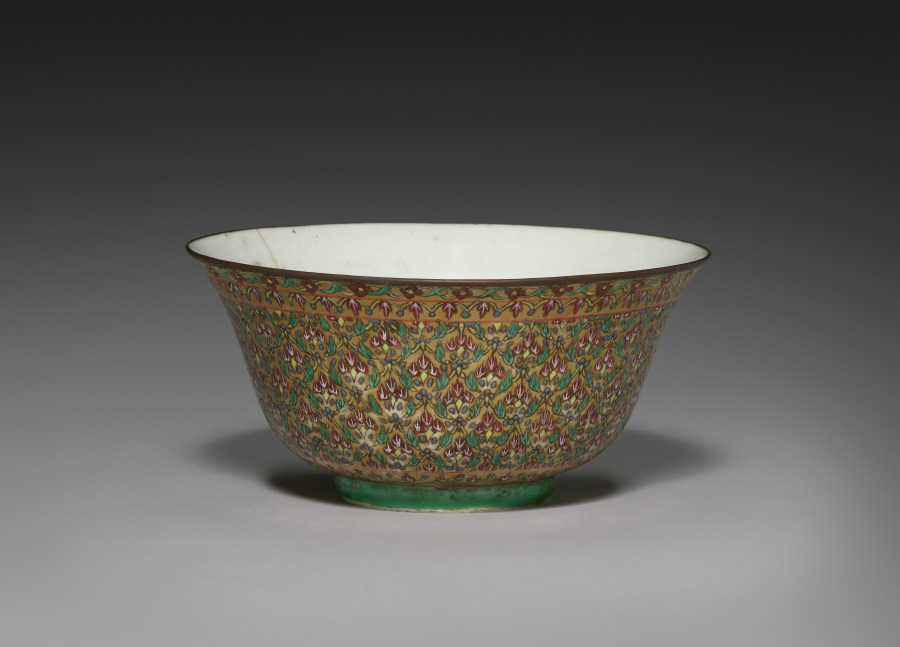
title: Chow Bowl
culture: Siam, 18th century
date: 1700s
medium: porcelain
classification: Metalwork